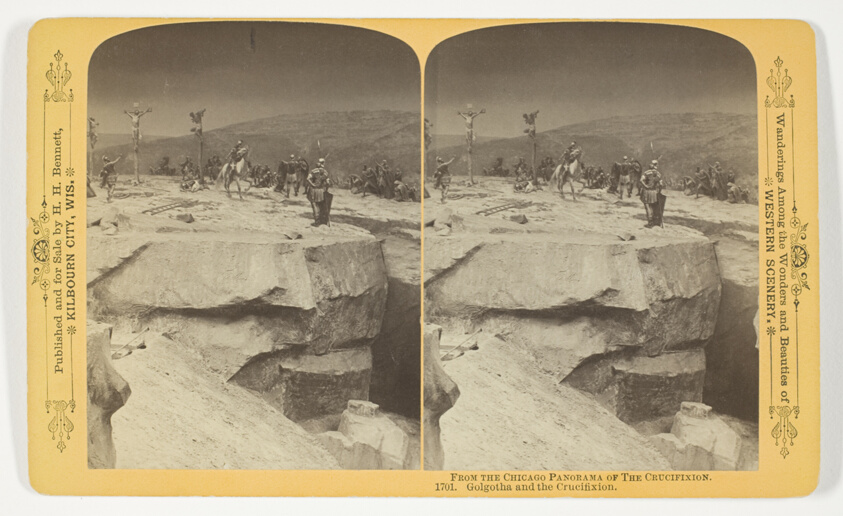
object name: Photograph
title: Golgotha and the Crucifixion, from the series "The Chicago Panorama of The Crucifixion"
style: 19th century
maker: Henry Hamilton Bennett (American, born Canada, 1843-1908)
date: 1893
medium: Albumen print, stereo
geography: Chicago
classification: photography; photograph; albumen silver print; stereograph (albumen)